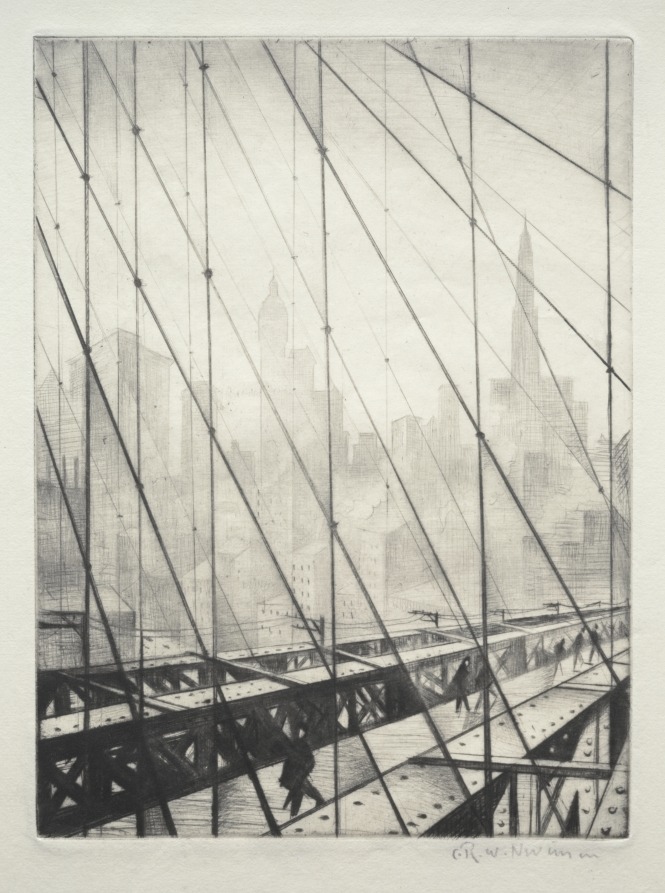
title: Looking through Brooklyn Bridge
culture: England, 20th century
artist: Christopher Nevinson (British, 1889–1946)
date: 1921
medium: drypoint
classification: Print